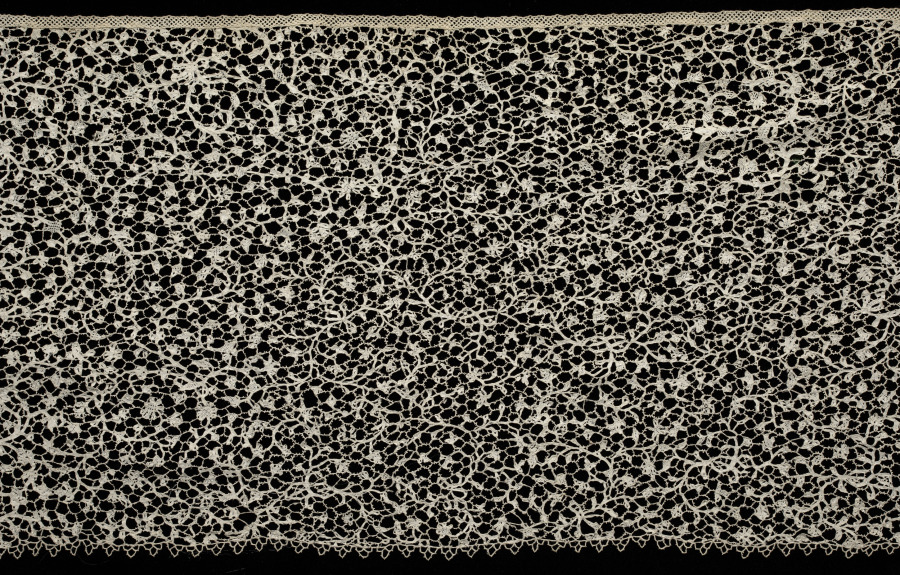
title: Lace Flounce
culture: Italy, Venice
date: 1640–60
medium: Needle lace (coralline point)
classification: Lace